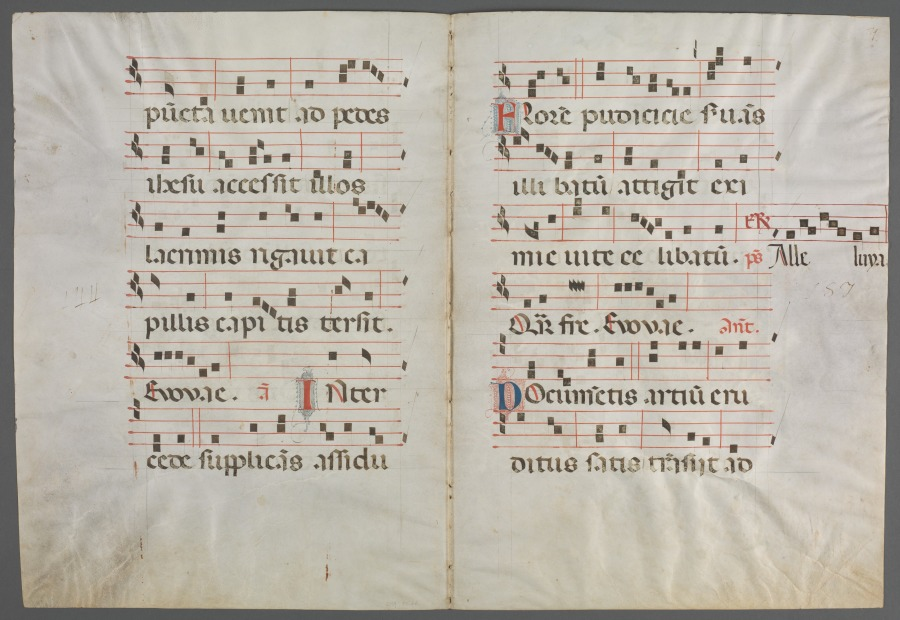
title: Bifolium from an Antiphonary: Music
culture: Italy, Bologna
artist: Primo Miniatore di San Domenico (Italian)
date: c. 1320–40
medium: ink, tempera, and gold on parchment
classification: Manuscript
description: The representation of Saint Dominic (1170–1221), founder of the Dominican Order of Preachers, in this initial suggests that this double page was at one time part of a manuscript made for a Dominican convent. Saint Dominic traveled much, preaching throughout Europe, and was particularly venerated in Bologna, the city in which he died and was buried. The illuminator of this initial is named after a volume he decorated of Seneca’s works (now in the Bibliothèque nationale in Paris). His workshop specialized in large-scale manuscripts destined for wealthy religious institutions in the region of Emilia, for which Bologna was the artistic and intellectual center.